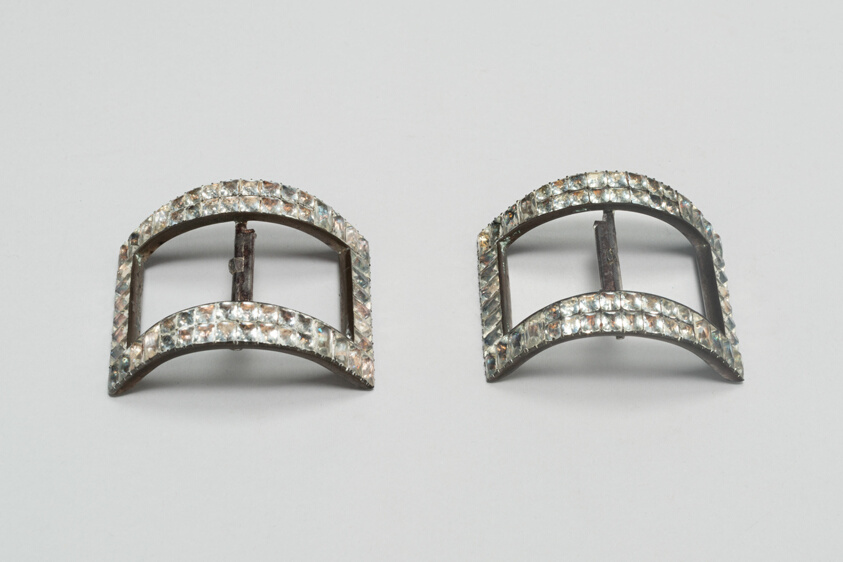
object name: Metalwork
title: Pair of Shoe Buckles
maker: London, England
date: Last quarter 18th century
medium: Silver and paste jewels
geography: England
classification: buckle (strap accessory); jewelry; costume accessory; european decorative arts; metalwork